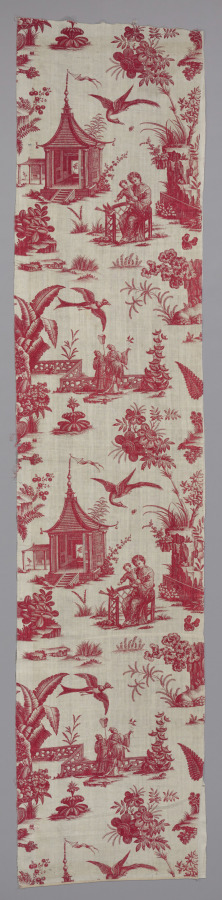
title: Copperplate-Printed Cotton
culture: England, Chambers, 18th century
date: 1700s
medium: copperplate printed cotton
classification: Textile